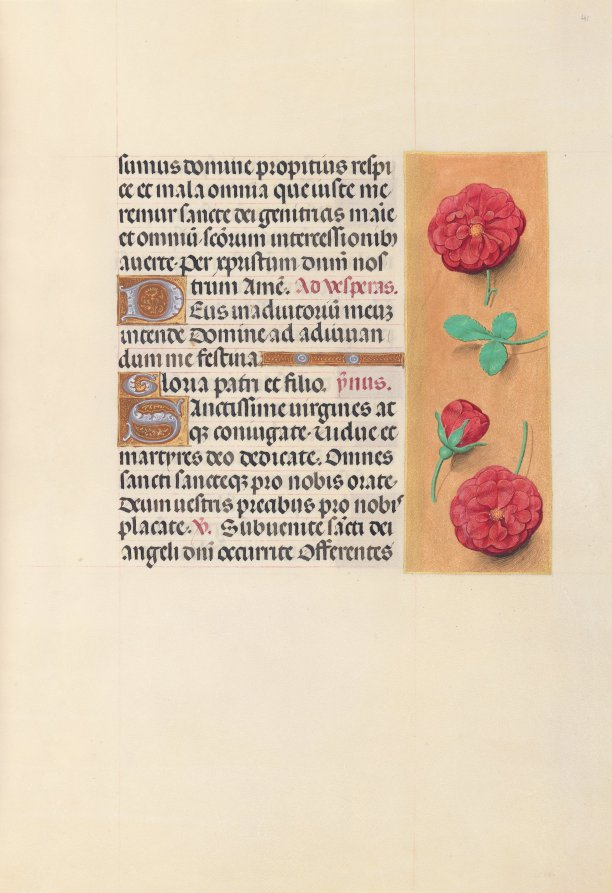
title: Hours of Queen Isabella the Catholic, Queen of Spain: Fol. 41r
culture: Flanders, Ghent and Bruges, late 15th century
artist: Master of the First Prayerbook of Maximillian (Flemish, c. 1444–1519)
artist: and Associates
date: c. 1500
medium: ink, tempera, and gold on vellum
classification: Bound Volume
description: This manuscript was illuminated by a circle of at least five highly organized manuscript painters active in the Flemish cities of Ghent and Bruges. The principal illuminator was Alexander Bening, who painted the majority of the book's miniatures. Manuscripts produced by this circle of artists are renowned for the decoration of their borders, which typically feature a rich variety of realistically-painted flowers, birds, and butterflies. This prayer book, called a book of hours, was intended not for a cleric, but for the private devotions of a lay person-in this case, Isabella the Catholic, Queen of Spain (1451-1504). Isabella's coat of arms embellishes the book's frontispiece. It is unlikely that the book was commissioned by the Queen herself; rather, she probably received it as a diplomatic gift from someone courting her patronage, perhaps Cardinal Francisco Jimenez de Cisneros. A Franciscan friar, Jimenez was dependent upon Isabella for his advancement, first to the post of Queen's confessor in 1492, and then to Archbishop of Toledo in 1495.